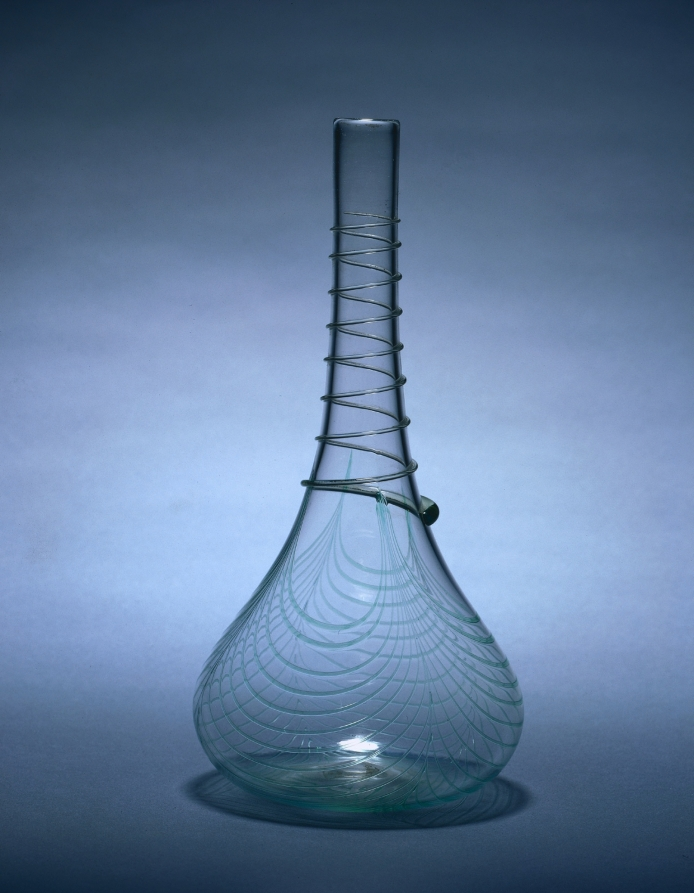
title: Decanter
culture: England, 20th century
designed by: Harry Powell (British, 1835–1922)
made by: Whitefriars Glasshouse (British)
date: after 1902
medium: glass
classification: Glass